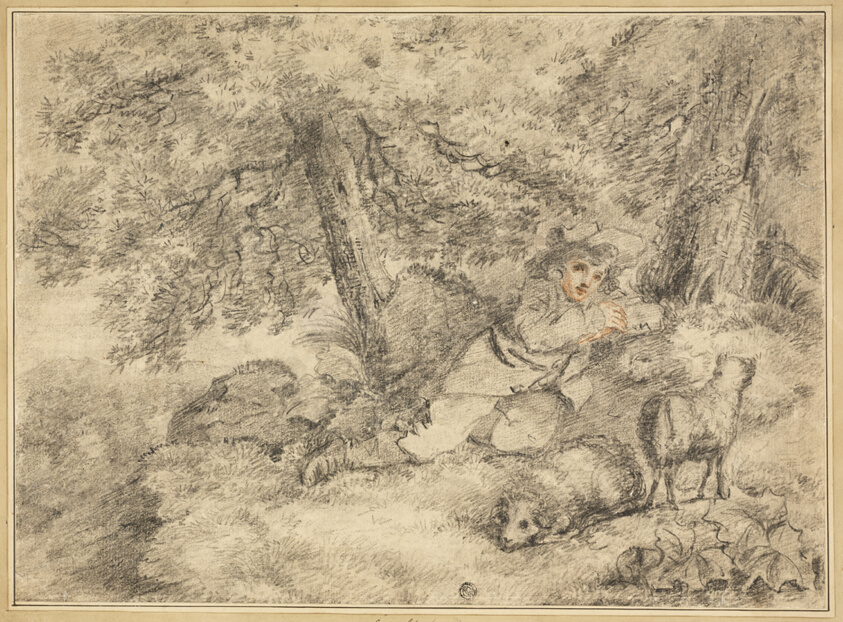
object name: Drawing and Watercolor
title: Shepherd Boy with Lambs in Woods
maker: George Morland (English, 1763-1804)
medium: Black and red chalk on cream laid paper, laid down on board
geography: England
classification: chalk; drawings (visual works); prints and drawing